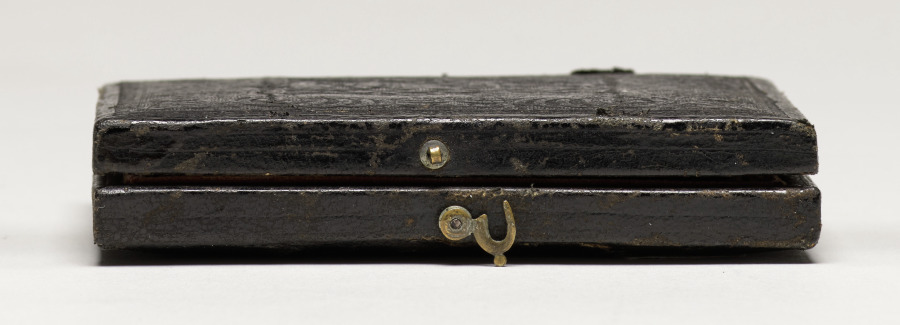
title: Two Oxen and Driver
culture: America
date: 1850s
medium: daguerreotype, sixth plate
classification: Photograph